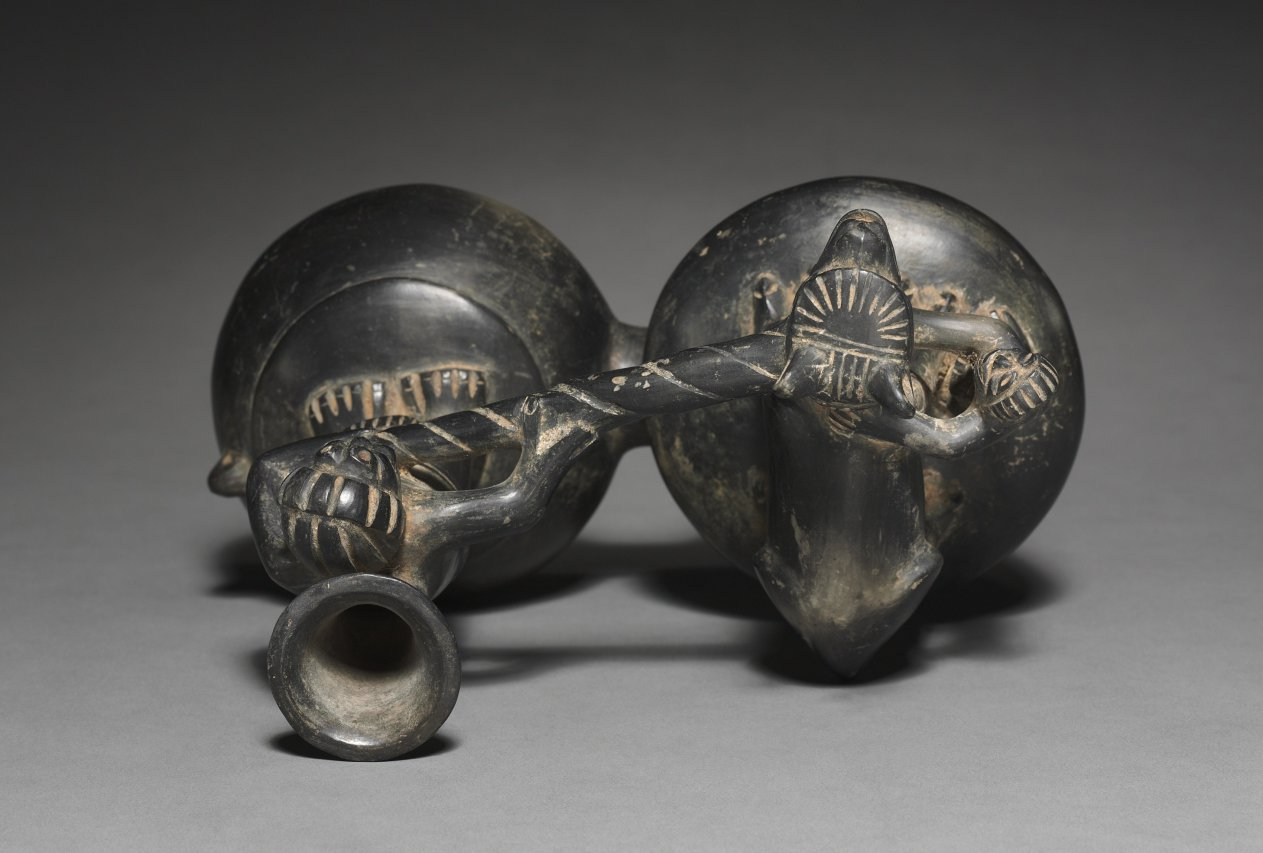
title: Double-chambered Vessel with Figures and Camelid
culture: Andes, Chimú-Inka, late 15th - mid 16th century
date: 1470–1532 (Thermoluminescence date, 1310–1610)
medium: ceramic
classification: Ceramic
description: Under the Chimú, ceramic seems to have been a less important artistic medium than for earlier north coast cultures. Accordingly, ceramics were mass-produced with molds and, rather than bearing painted scenes, often have an overall dark surface achieved by firing in a smoky atmosphere. The double-chambered vessel was made after the Inka conquered the Chimú in the 1460s.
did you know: When this vessel is filled with liquid and tilted back and forth, the camelid emits a whistling sound.